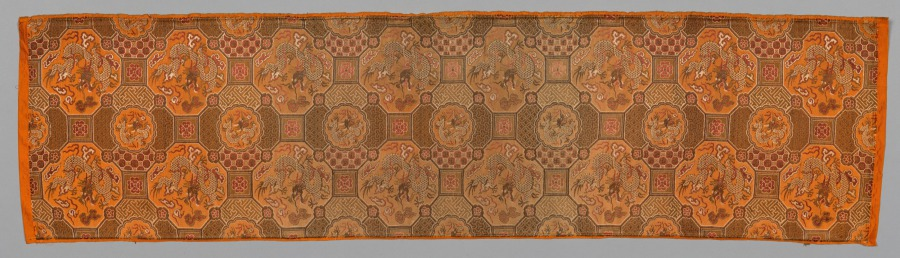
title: Table Runner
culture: Japan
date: late 19th-early 20th century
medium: silk and metallic thread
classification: Textile